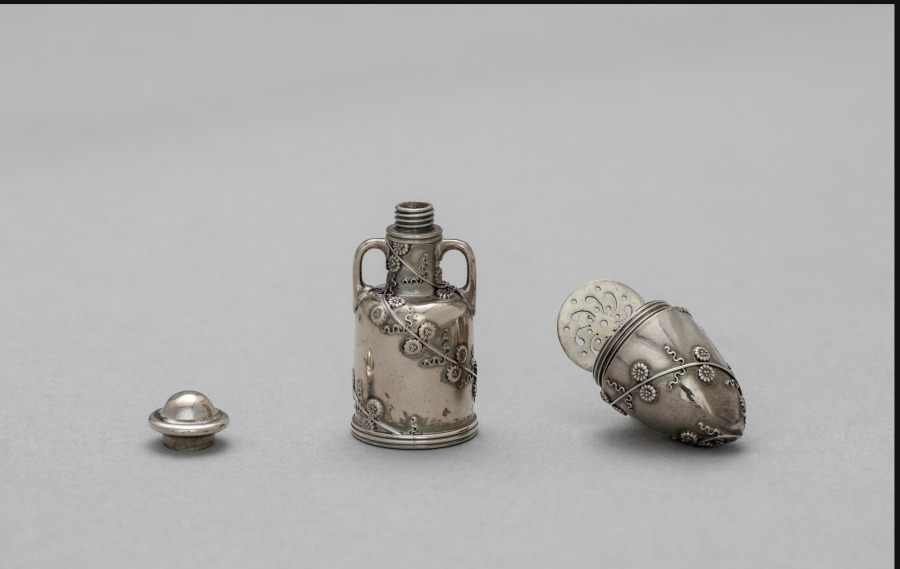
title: Scent Bottle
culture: America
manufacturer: Tiffany & Co. (America, New York, est. 1837)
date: c. 1860–70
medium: silver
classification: Silver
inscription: Inside mark: Tiffany & Co. 2662 (...) - this is too small to read M2108 Union Square